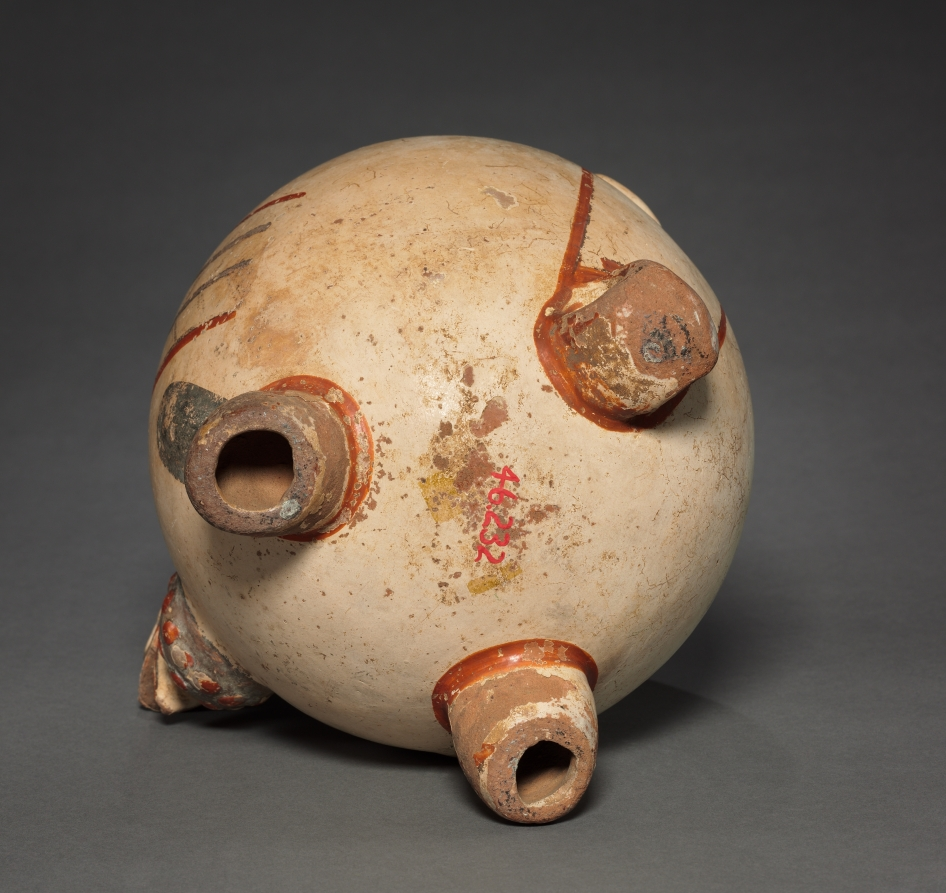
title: Footed Vase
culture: Costa Rica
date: 1000–1550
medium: earthenware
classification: Ceramic